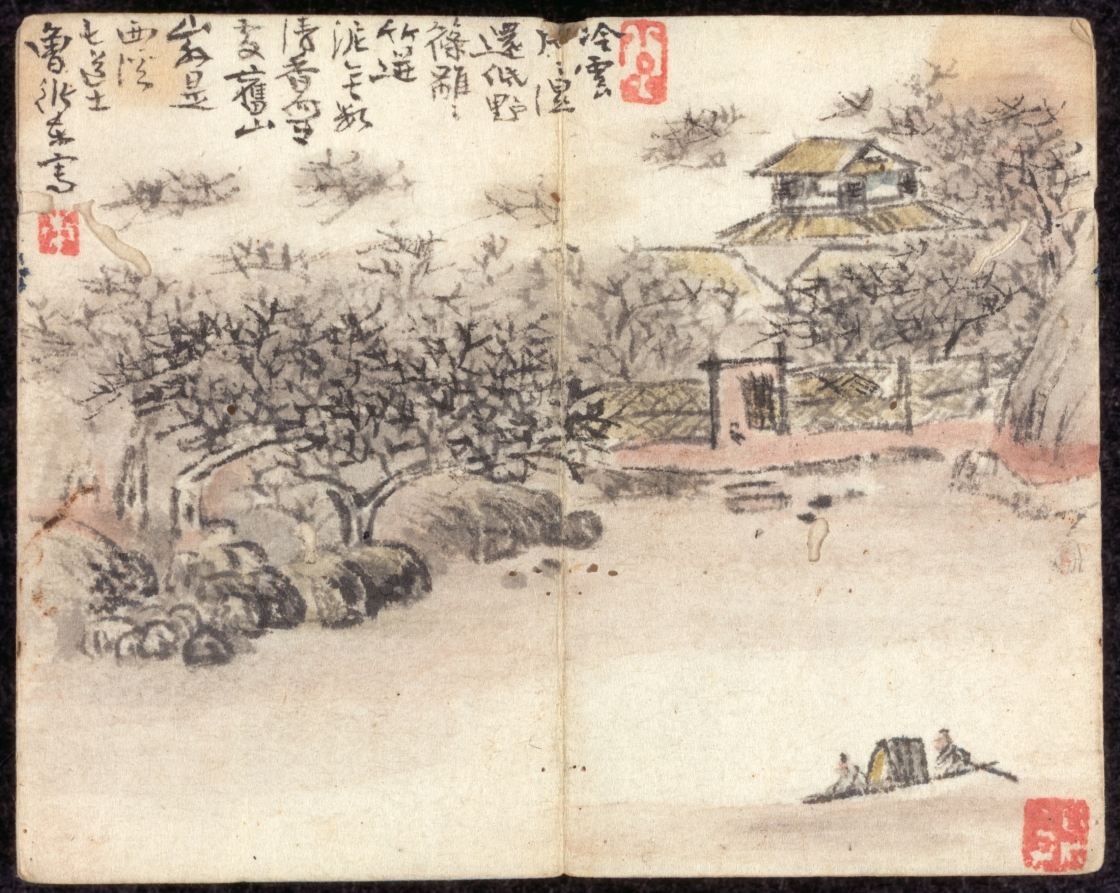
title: Miniature Album with Figures and Landscape (Landscape with Two Boatmen)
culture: China, Qing dynasty (1644–1911), Qianlong reign (1736–95)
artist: Zeng Yandong (Chinese, c. 1751–1827)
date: 1822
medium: album leaf, ink and color on paper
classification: Painting